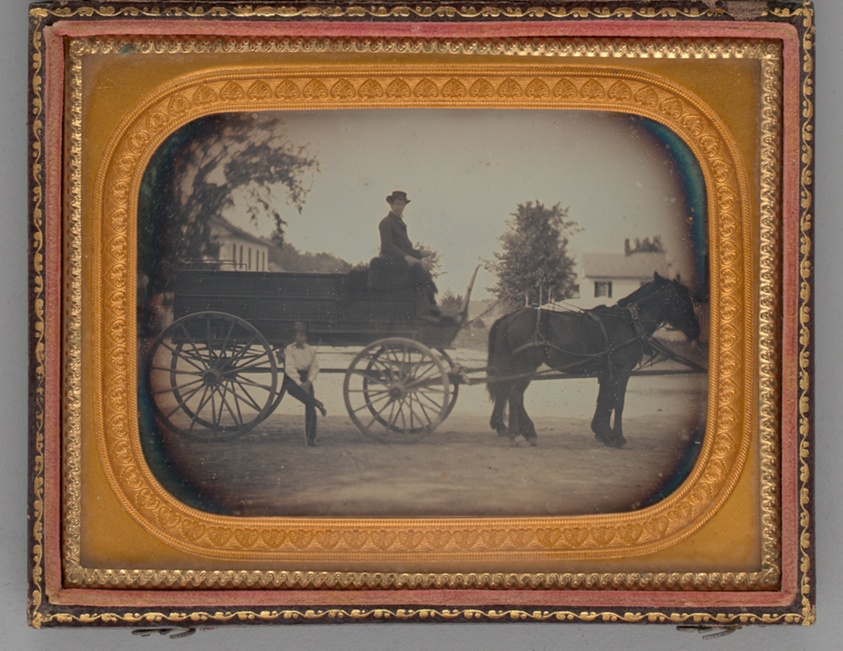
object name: Photograph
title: Untitled (Two Men and a Horse-Drawn Carriage)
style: 19th century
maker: Unknown maker; American, 19th century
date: 1857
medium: Daguerreotype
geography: United States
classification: portrait; daguerreotype; portrait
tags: lundberg collection, people, animals, horse-drawn carriage, horses, Male, portraits, portraits: male subject